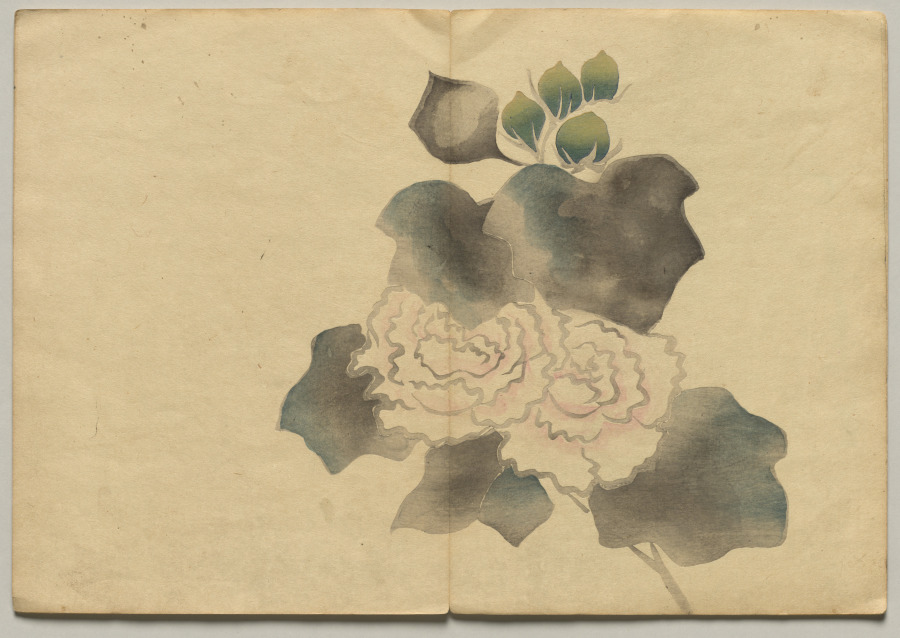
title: Scene from The Kōrin Picture Book (Volume 2)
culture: Japan, Edo period (1615–1868)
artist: Nakamura Hōchū (Japanese, d. 1819)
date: 1800s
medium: color woodblock printed book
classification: Bound Volume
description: Ogata Korin (1658-1716) was one of the most admired artists of Rimpa, or "decorative school painting." These books by the charming later-generation Rimpa artist Hochu record Korin's inventive designs.